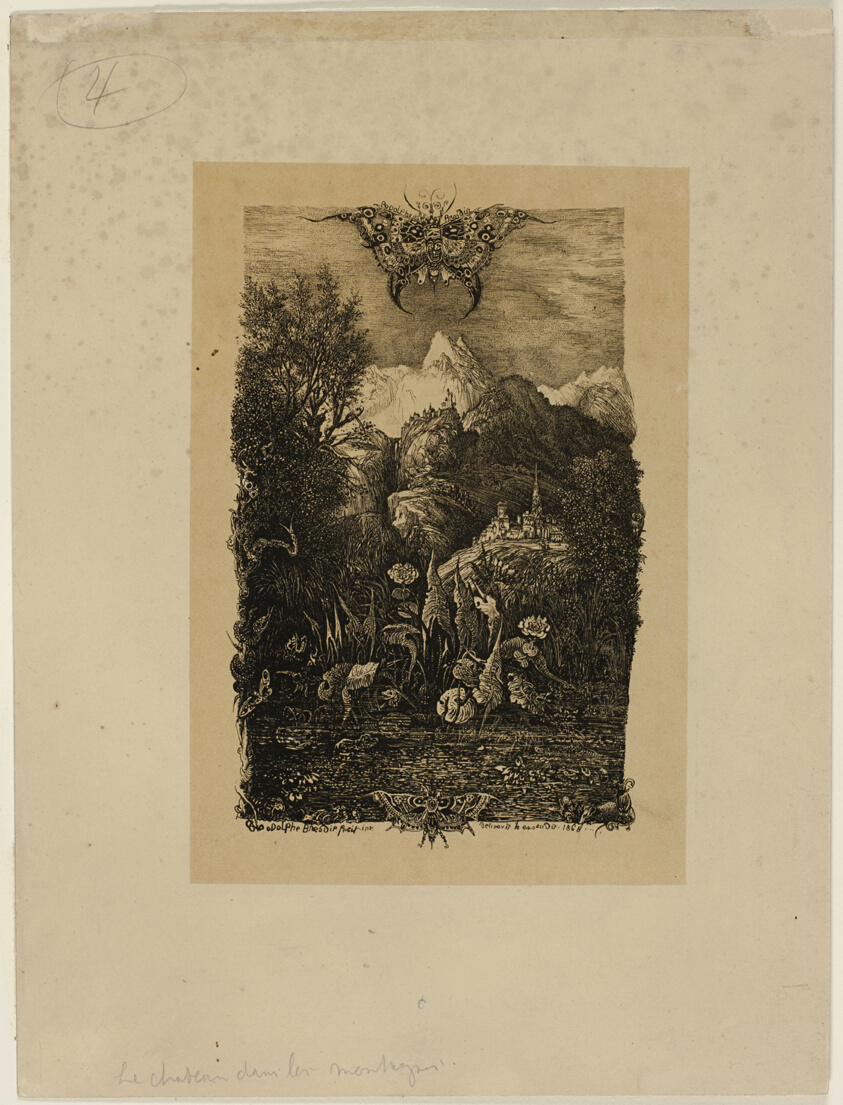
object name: Print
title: The Butterfly and the Pond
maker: Rodolphe Bresdin (French, 1825-1885)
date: 1868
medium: Lithograph (etching transfer) in black on tan-toned cream wove paper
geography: France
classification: etching; print; prints and drawing